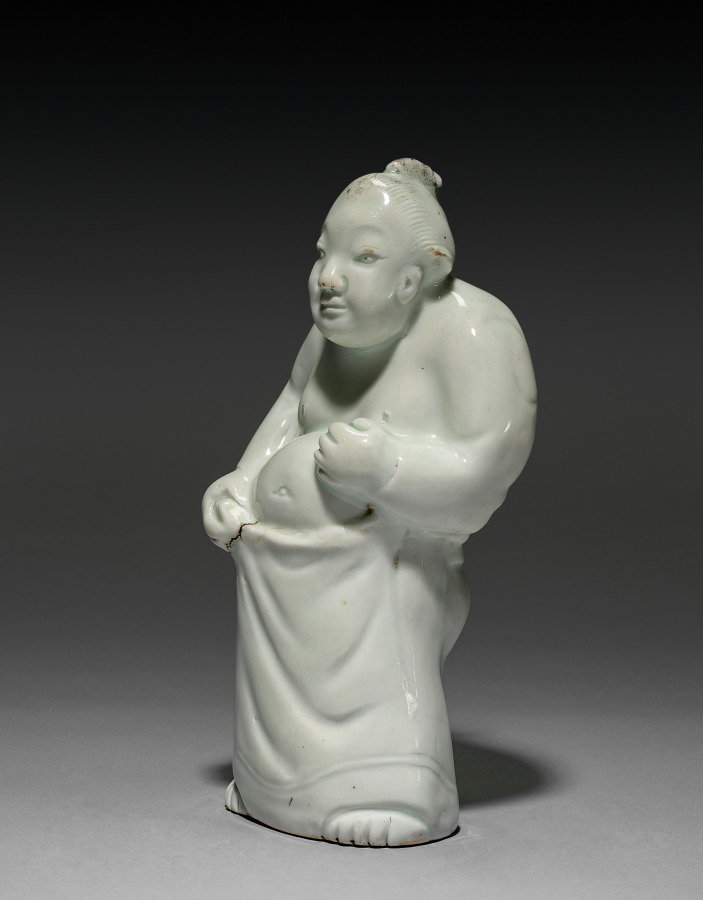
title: Standing Figure of a Sumo Wrestler, Arita Ware (?)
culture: Japan, Edo period (1615–1868)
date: 1700s-1800s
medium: porcelain, molded and carved, with celadon overglaze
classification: Sculpture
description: Catalogue of the Severance and Greta Millikin Collection (CMA, 1990): 85, no. 137.